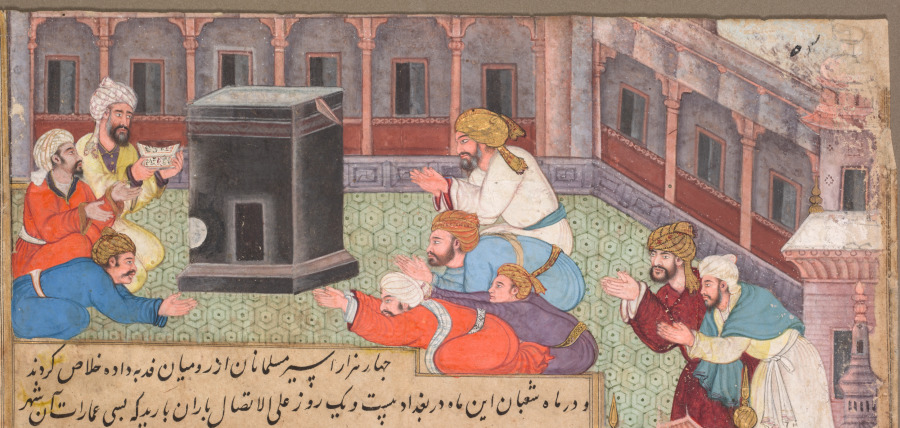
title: Page of disasters, from the Tarikh-i Alfi (History of a Thousand Years)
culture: India, Mughal school, 16th century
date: c. 1595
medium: Gum tempera, ink, and gold on paper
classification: Painting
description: A distinctive feature of this manuscript is the descriptive painting surrounding the blocks of text. At the top of this page is a depiction of the sacred center of Islam, the black stone structure called the Ka‘ba in Mecca that the Prophet Muhammad cleansed of pre-Muslim idols. The Ka‘ba is the endpoint of the Islamic pilgrimage that all Muslims are enjoined to make at least once during their lifetime. Remarkably, Akbar’s name appears on the page of the book held by a devotee, where only prayers or Qur'anic passages should be found. During the time of the caliph who persecuted Shi‘ites, Mecca experienced a drought. Fountains of water now were dry, and pilgrims had to buy water that was carried there.